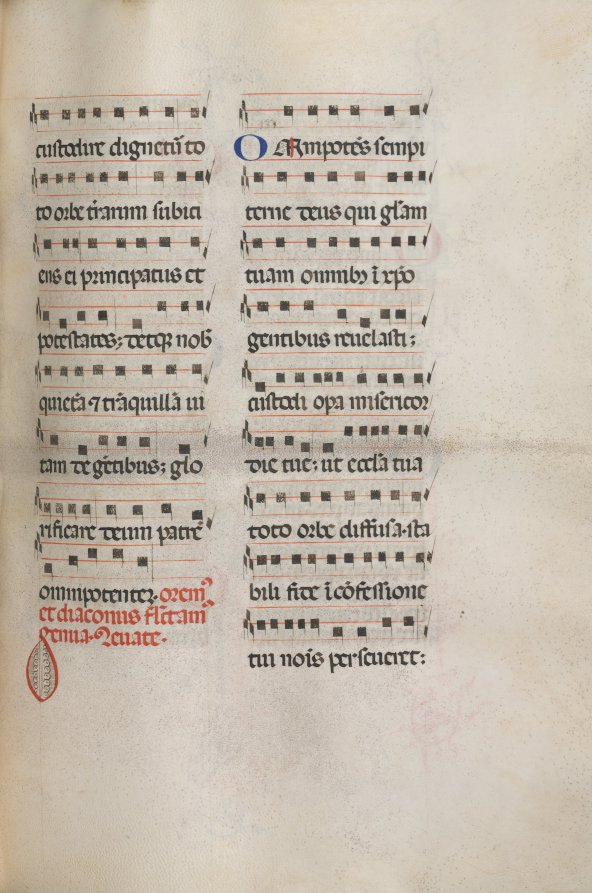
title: Missale: Fol. 146: Music for various prayers "Oremus dilectissimi..." and "Omnipotens sempiterne Deus"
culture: Italy, Perugia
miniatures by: Bartolommeo Caporali (Italian, c. 1420–1503)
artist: assisted by Giapeco Caporali (Italian, d. 1478)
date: 1469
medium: ink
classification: Bound Volume